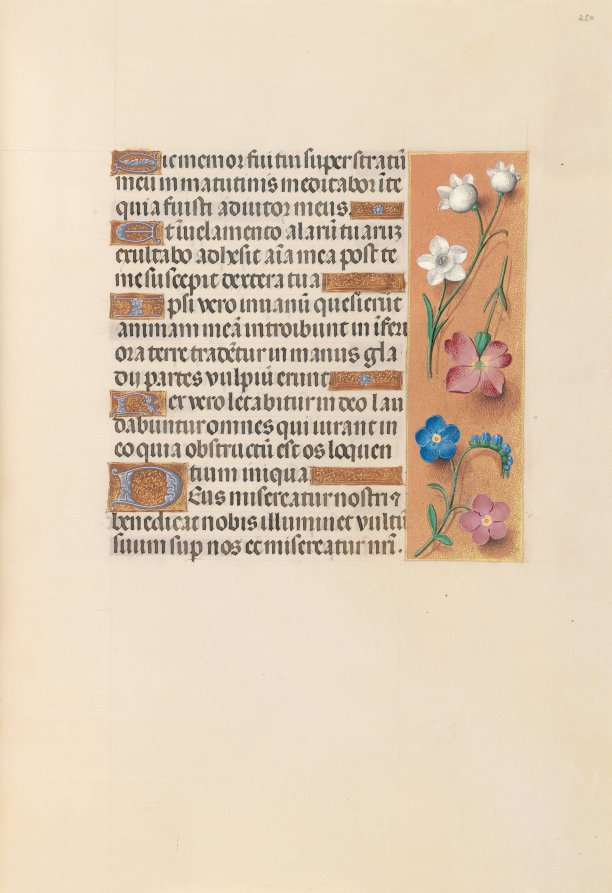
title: Hours of Queen Isabella the Catholic, Queen of Spain: Fol. 250r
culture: Flanders, Ghent and Bruges, late 15th century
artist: Master of the First Prayerbook of Maximillian (Flemish, c. 1444–1519)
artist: and Associates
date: c. 1500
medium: ink, tempera, and gold on vellum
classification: Bound Volume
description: This manuscript was illuminated by a circle of at least five highly organized manuscript painters active in the Flemish cities of Ghent and Bruges. The principal illuminator was Alexander Bening, who painted the majority of the book's miniatures. Manuscripts produced by this circle of artists are renowned for the decoration of their borders, which typically feature a rich variety of realistically-painted flowers, birds, and butterflies. This prayer book, called a book of hours, was intended not for a cleric, but for the private devotions of a lay person-in this case, Isabella the Catholic, Queen of Spain (1451-1504). Isabella's coat of arms embellishes the book's frontispiece. It is unlikely that the book was commissioned by the Queen herself; rather, she probably received it as a diplomatic gift from someone courting her patronage, perhaps Cardinal Francisco Jimenez de Cisneros. A Franciscan friar, Jimenez was dependent upon Isabella for his advancement, first to the post of Queen's confessor in 1492, and then to Archbishop of Toledo in 1495.